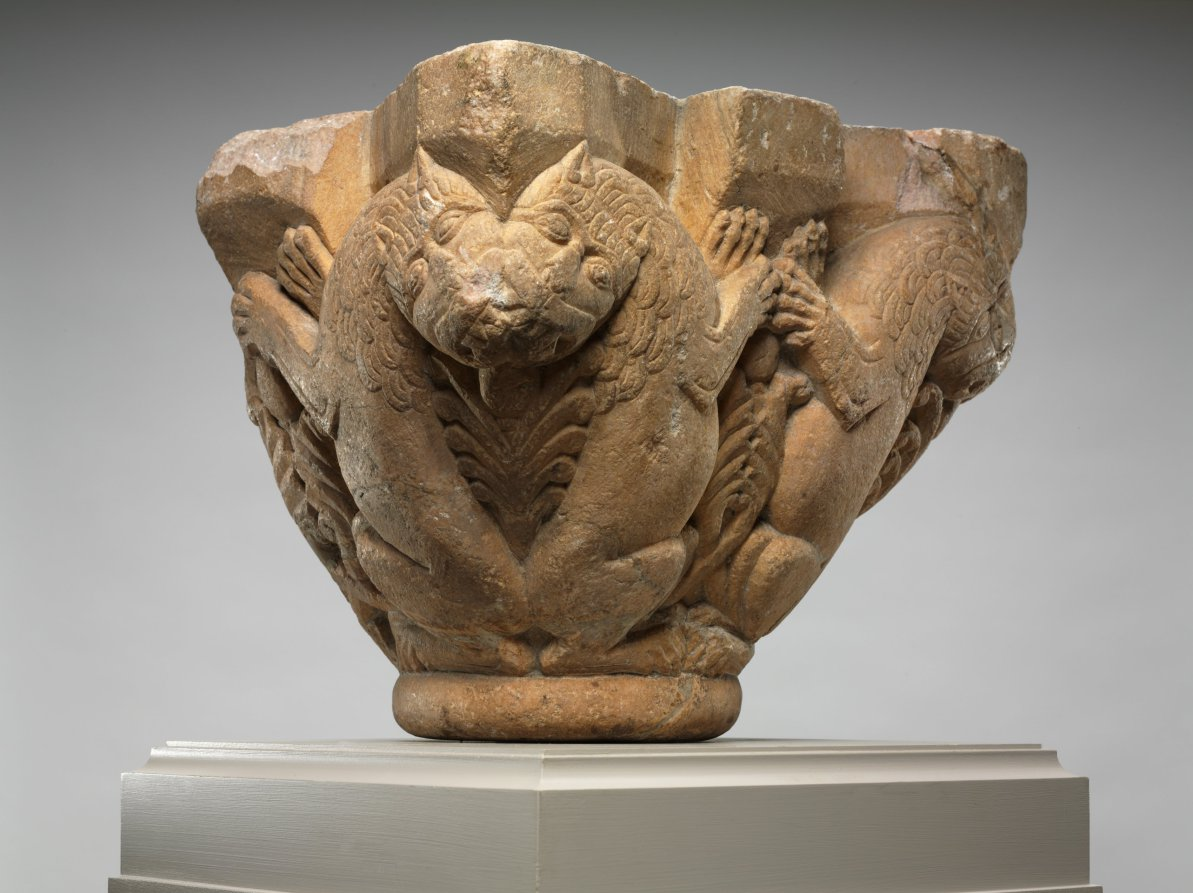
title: Engaged Capital with Lions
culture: Northern Spain (Navarre ?) or Southwest France (Pyrénées or Roussillon ?), mid-12th century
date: 1145–64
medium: marble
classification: Sculpture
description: The compositional motif of confronted and addorsed beasts illustrated on this capital was especially popular in churches along the pilgrimage roads.